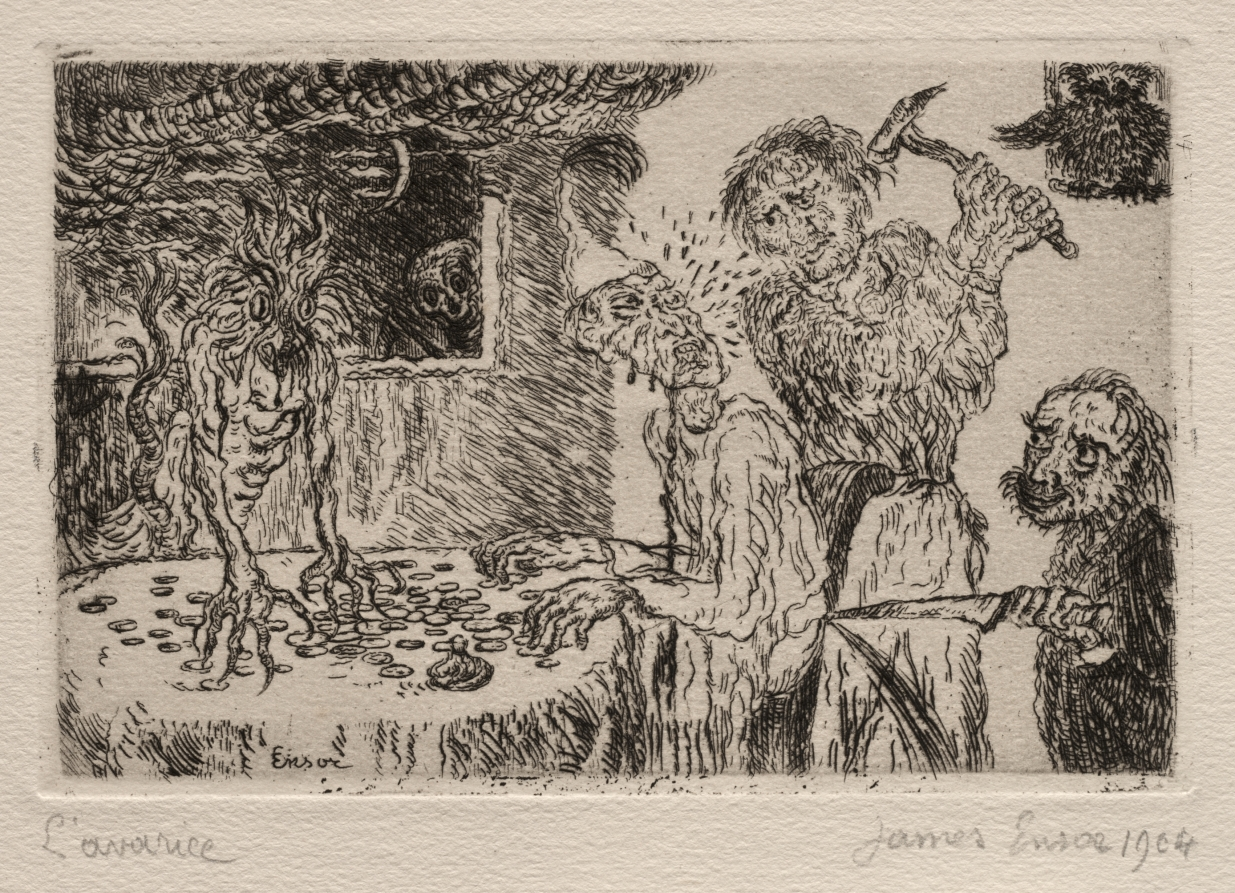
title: The Seven Deadly Sins: Avarice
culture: Belgium, 19th-20th Century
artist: James Ensor (Belgian, 1860–1949)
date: 1904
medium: etching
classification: Print